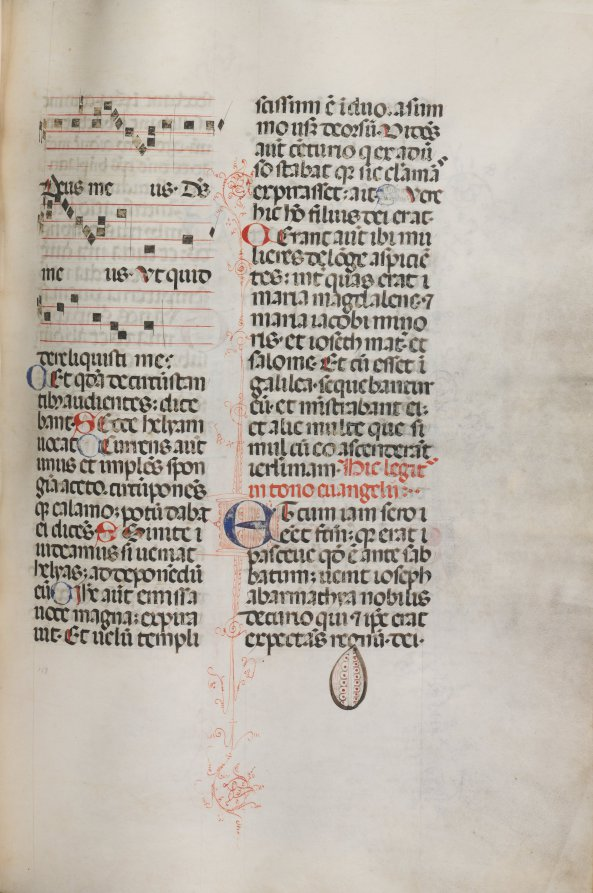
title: Missale: Fol. 129: contains music for "Hely Hely Lama etc." within St. Mattion Passion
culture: Italy, Perugia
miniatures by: Bartolommeo Caporali (Italian, c. 1420–1503)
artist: assisted by Giapeco Caporali (Italian, d. 1478)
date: 1469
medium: ink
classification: Bound Volume